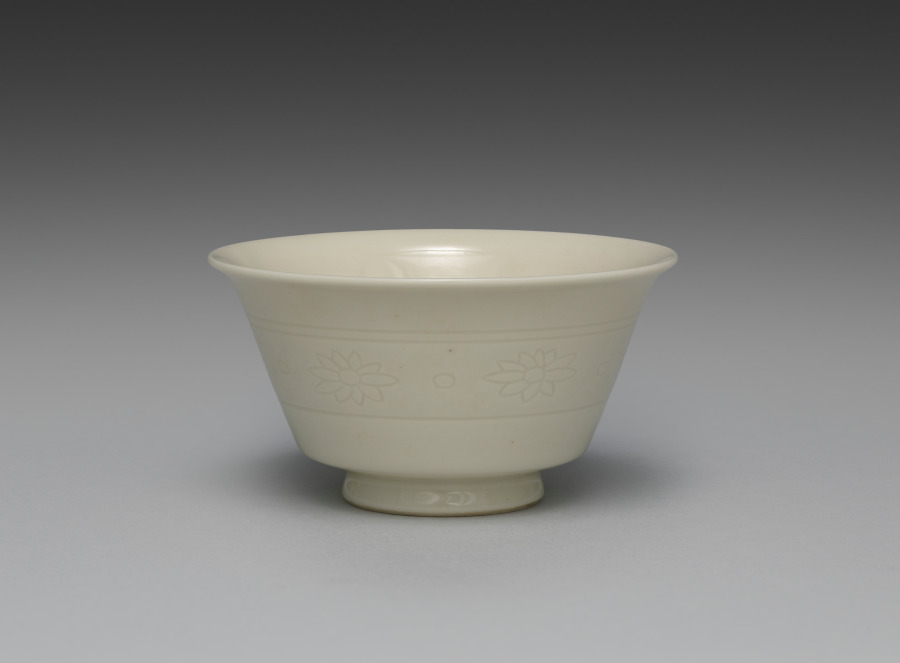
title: Teacup from Teacups with Floral Band Motif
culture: Japan, Meiji period (1868–1912)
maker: Seifū Yohei III (Japanese, 1851–1914)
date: 1893–1914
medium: One from a set of five cups; porcelain with incised decoration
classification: Ceramic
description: The five sencha teacups in this set are decorated with incised flowers and dots between a double band at the top and a single band at the bottom. They are in Yohei III’s creamy taihakuji body and glaze. In their motifs, they are quite similar to an incense burner by Yohei III (see CMA 2022.180), but the flowers are even more simple in design, with no open circle at the center. A label affixed to the side of the box refers to them as “sencha cups in emulation of Korean white [ware].” The reference to Korean ware indicates that even though Yohei was more directly inspired by Qing dynasty wares from the Dehua kilns in Fujian Province in developing his porcelain clay and glaze for works such as these, the general understanding of the continental models still placed them, at least in terms of color, among pieces broadly associated in Japan with Korean white wares. The delicate cups are thinly potted, so they have a highly desirable translucency.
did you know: The delicate cups in this set are thinly potted, so they have a highly desirable translucency.